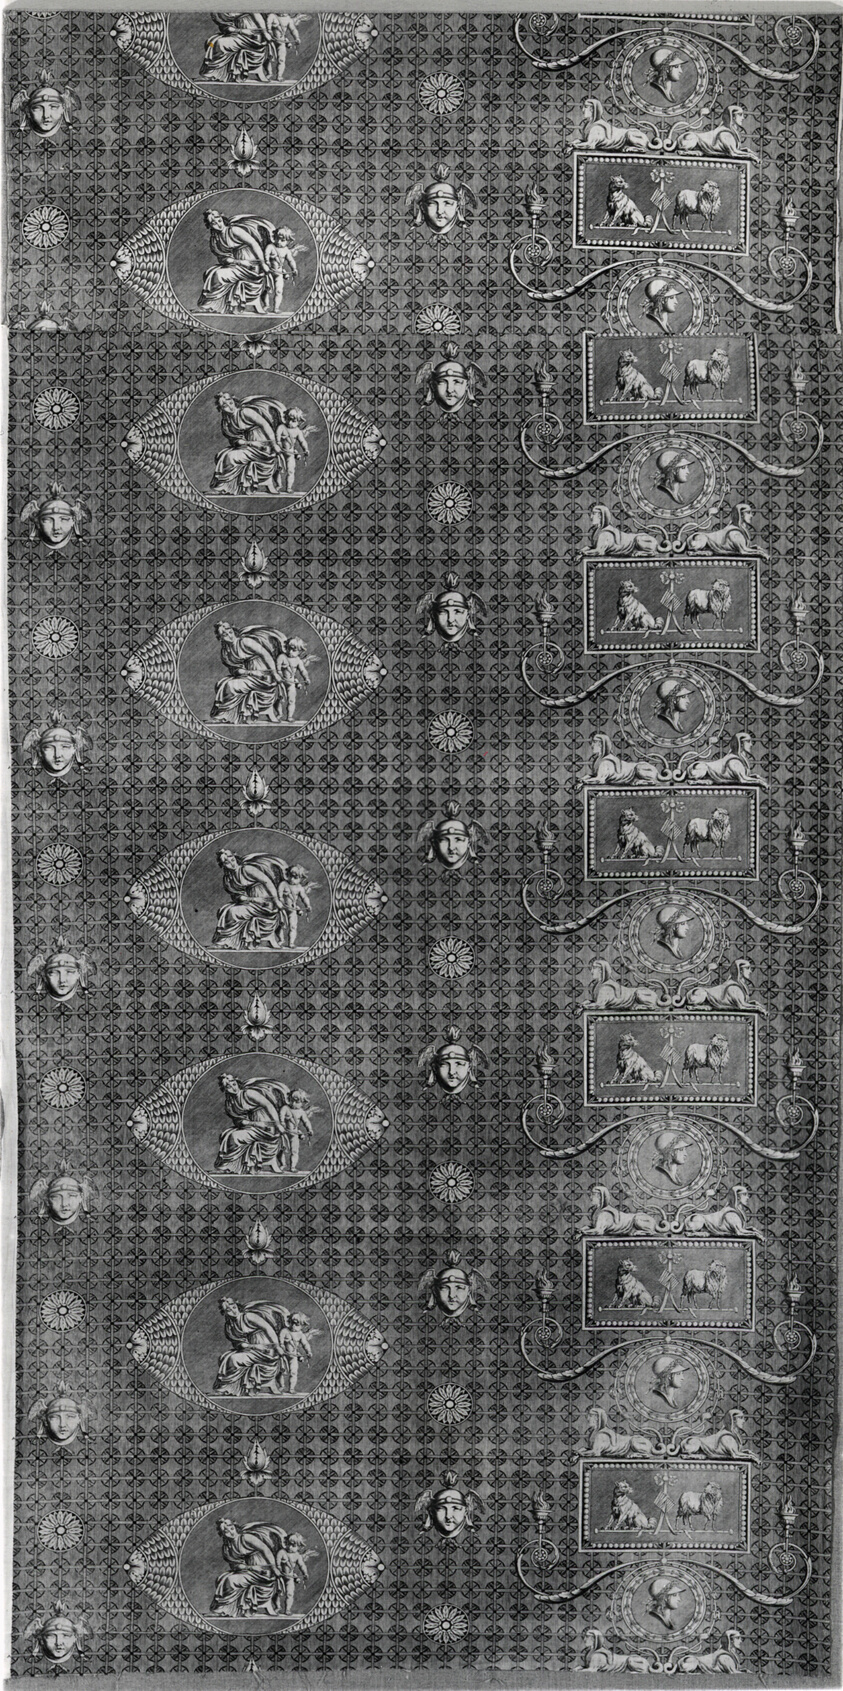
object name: Textile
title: L'Amour Vainquerur (Love Triumphant) (Furnishing Fabric)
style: jouy-en-Josas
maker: Designed by Jean Baptiste Huet (French, 1745–1811) or Hippolyte Lebas (French, 1782–1867); Manufactured by Christophe-Philippe Oberkampf (naturalized French, 1738-1815), Oberkampf Manufactory (French, 1760-1843); Jouy-en-Josas, France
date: c.1804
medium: Cotton, plain weave; engraved roller printed; two pieces joined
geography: Jouy-en-Josas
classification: textile; weaving - printed; furnishing textile